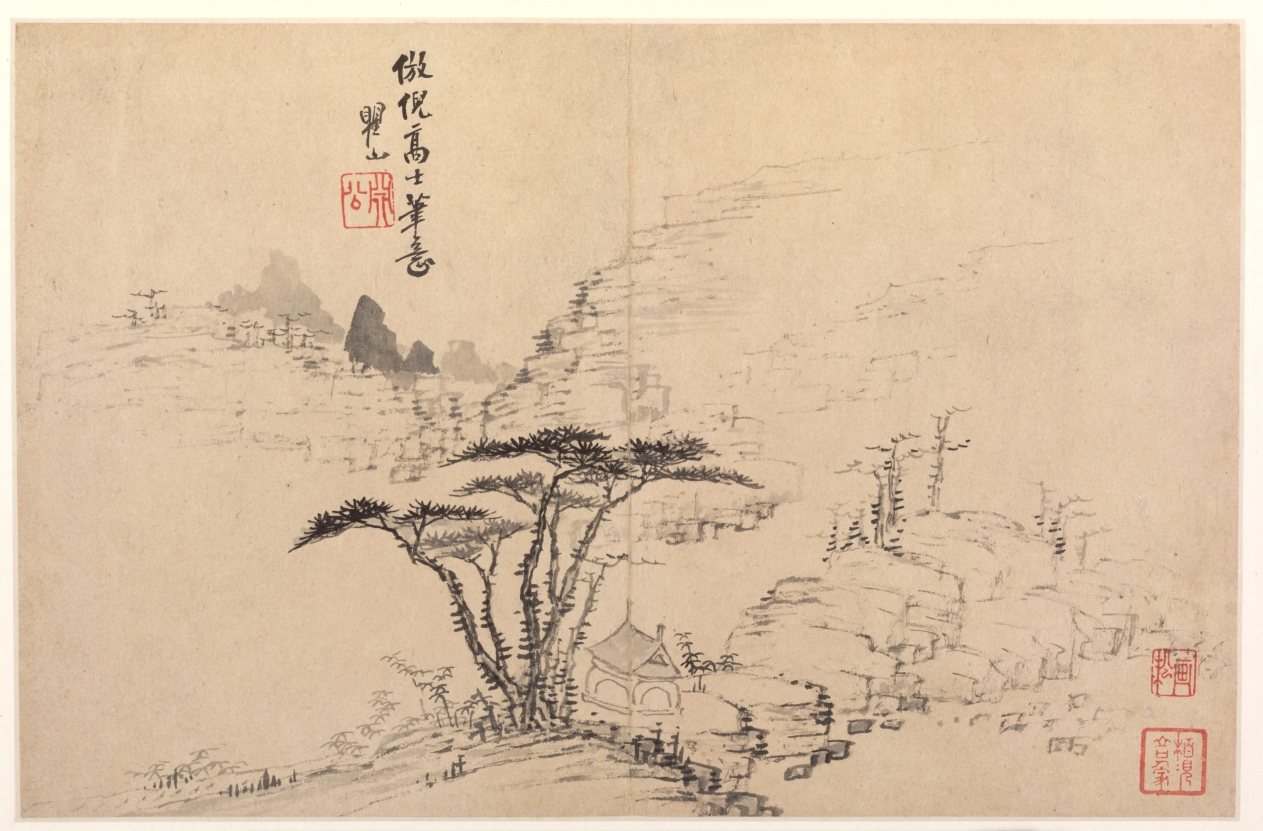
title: Landscapes in Various Styles after Old Masters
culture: China, Qing dynasty (1644-1911)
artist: Mei Qing (Chinese, 1623–1697)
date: 1690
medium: album leaf: ink and color on paper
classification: Painting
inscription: Winter Leaf I (formerly Leaf E). Artist's inscription, signature, and seals: Imitating Ni Gaoshi's [Ni Zan] brush idea. Qushan [seal] Yuangong. [2 seals, lower right corner] Huasong; Bo jian shan kou ren jia.